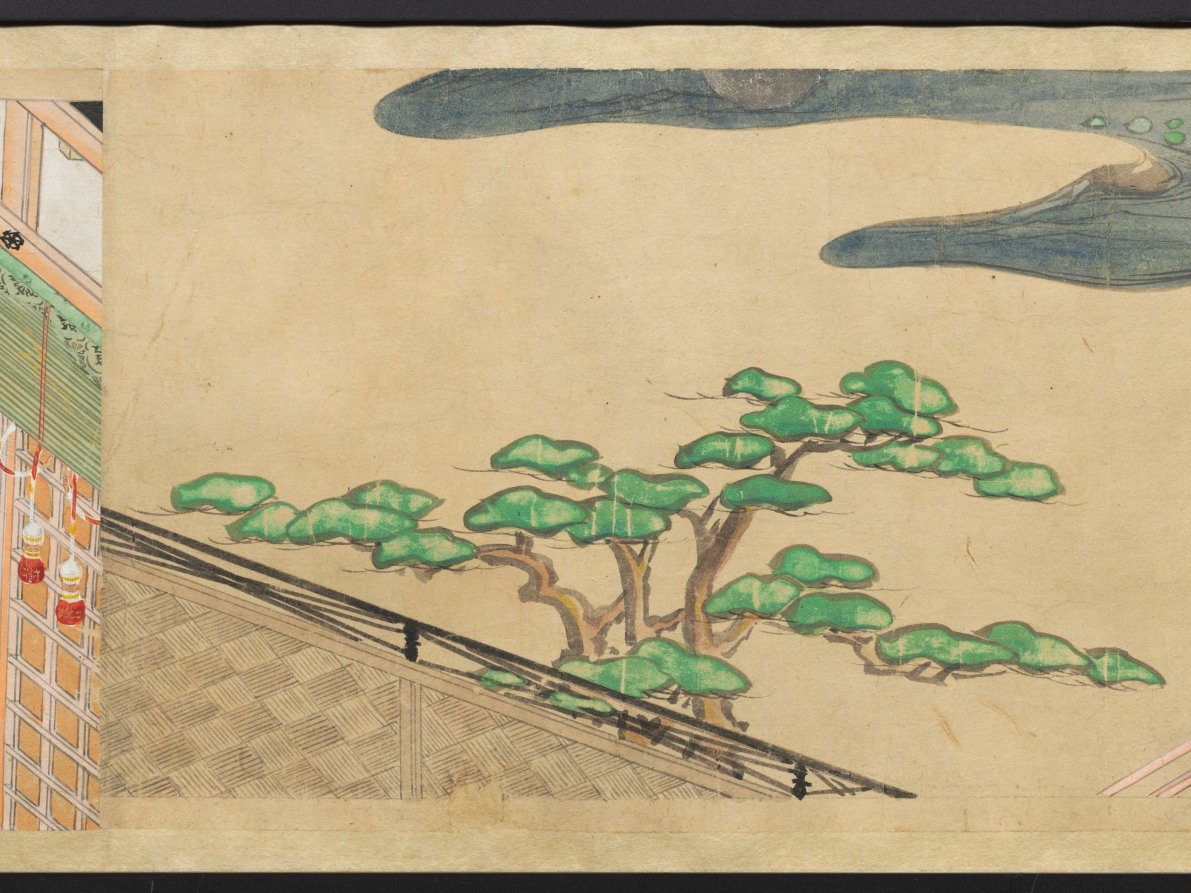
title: The Saltmaker's Story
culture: Japan, Edo period (1615–1868)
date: early 1600s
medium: One of a pair of handscrolls; ink, color, and gold on paper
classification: Painting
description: Once read and copied by girls at New Year’s celebrations and included in dowries, The Saltmaker’s Story is a rags-to-riches tale in which daughters are gifts from the gods. Despite his simple outlook, the main character progresses from humble roots as an associate at Kashima Shrine to the elite status of grandfather of the emperor through the intervention of the Kashima deity. The Saltmaker’s Story is traditionally presented in a set of three scrolls, but the text of this set has been removed by a previous owner, who remounted the illustrations as a pair. The paintings of this one take us from right to left through the first half of the tale.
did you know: This handscroll originally had texts before its paintings, but the texts were removed.